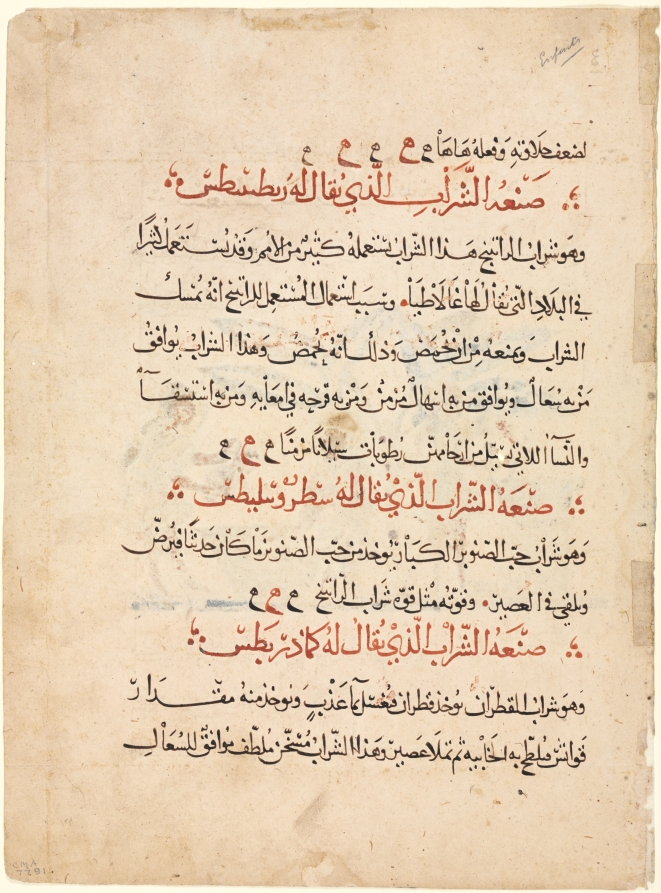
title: Text page from a Materia Medica of Dioscorides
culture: Iraq, Baghdad, Abbasid Period, 13th Century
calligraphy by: Abdallah ibn al-Fadl (Iraq)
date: c. 1224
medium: ink and opaque watercolor on paper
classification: Manuscript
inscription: Script: Naskh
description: This page is from an herbal, an illustrated book on the properties of plants. Herbals were among the first manuscripts of the Islamic world to include painted figural imagery. The lines in red are titles signaling how to make a particular kind of medicine. Initially written in Greek by a physician working for the Roman imperial army in what is present-day Turkey during the 1st century AD, the text was translated into Arabic during the 800s for a caliph who sponsored many translations of Greek scientific and philosophical treatises. This copy entered the royal Topkapi Palace library in Istanbul, from where 33 of its illustrated pages were dispersed to various collections. The first recipe on the text page describes the production of a syrup used for coughs, chronic diarrhea, and the treatment of syphilis in women. It states that the herb wormwood should be added to give it a more pleasant smell. The second recipe is for a syrup made from pine nuts, and the third is used to relieve chest pains and coughing without fever. The painting on the reverse depicts a physician in red and his two assistants preparing a medicinal syrup thought to be good for digestion. In accordance with the instructions on the page, tar in the consistency of dough is to be washed in salt water, then plain water. The artist has shown the washing taking place in a great basin. The syrup is then boiled, as seen on the left, and ladled into a bowl for storage.